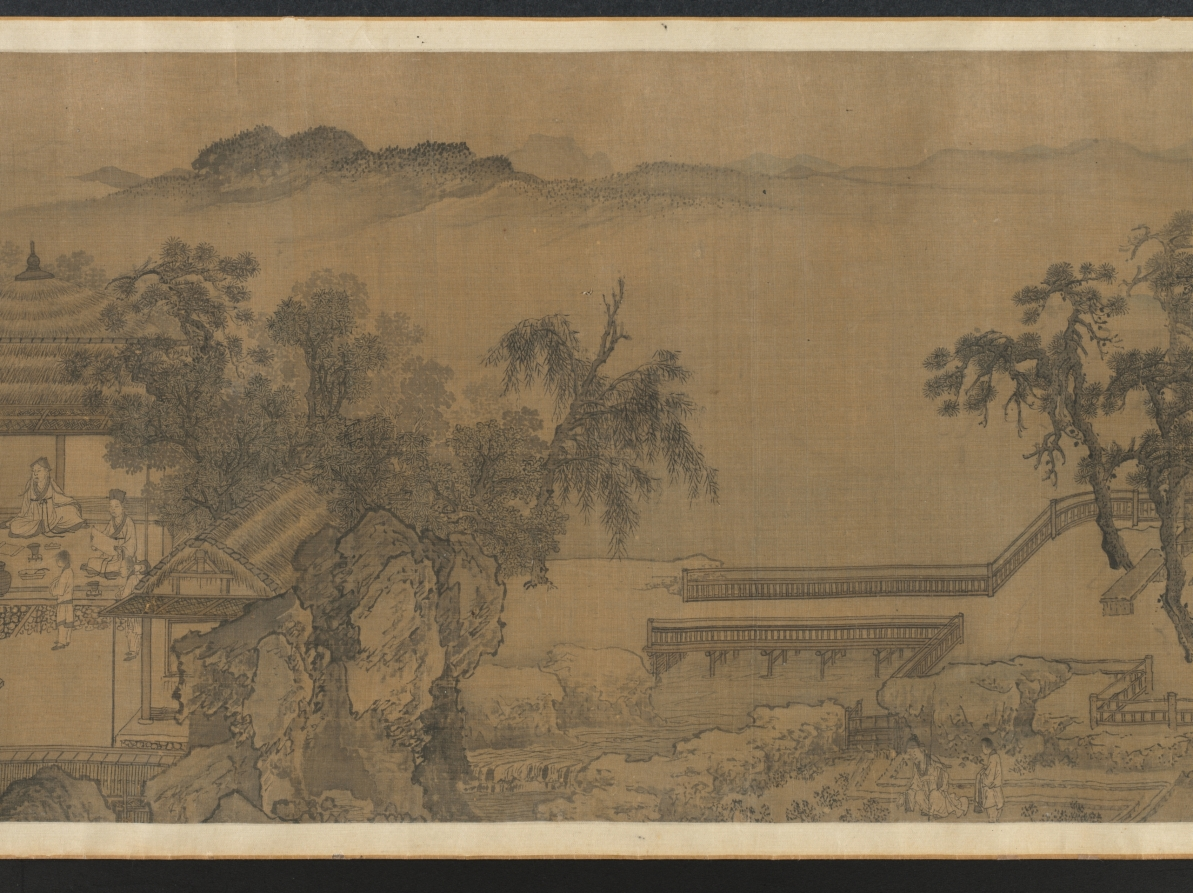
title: Tao Yuanming's Return Home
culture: China, Yuan dynasty (1271-1368)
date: 1300s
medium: Handscroll; ink and slight color on silk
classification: Painting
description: Tao Yuanming's revered poem "Return Home 歸去來辭 (Gui qu lai ci)" powerfully conveys his desire to leave bureaucratic life for the simplicity and authenticity of nature. This sentiment has deeply resonated with generations of Chinese scholars, making it a popular theme in paintings. This handscroll uses continuous narrative depicting Tao in multiple scenes from the poem. Starting on the right, the poet travels to his home. His children wait by the gate, while his wife pauses to tidy her hair before welcoming him. Then, free from the burdens of official service, Tao spends time in both nature and his cottage, where he can again enjoy wine, music, and books.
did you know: Poet Tao Yuanming 陶淵明 (c. 365–427 CE) returned to a secluded life instead of pursuing a civil service career.